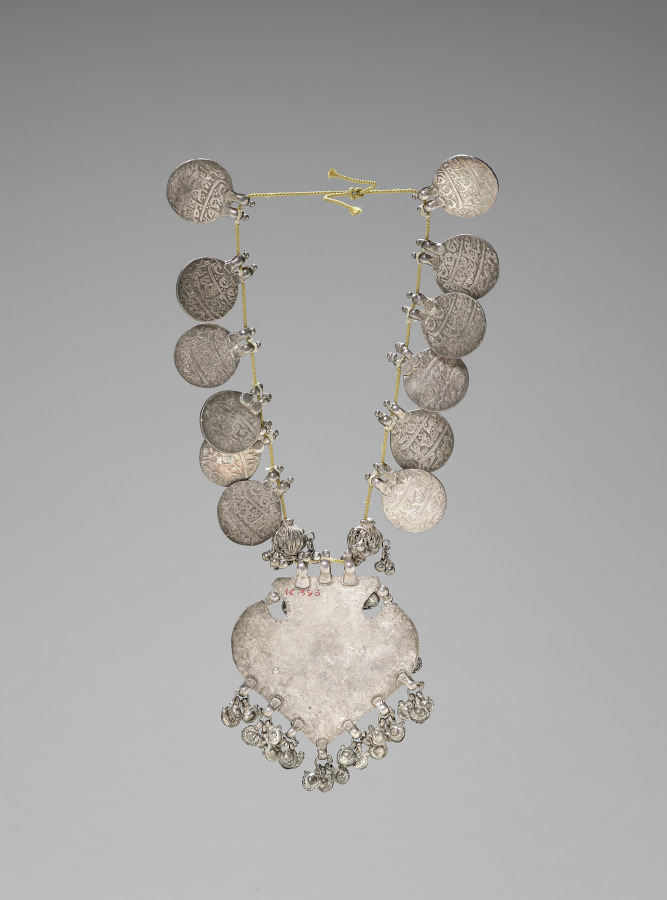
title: Necklace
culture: India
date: 1800s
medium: silver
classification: Jewelry